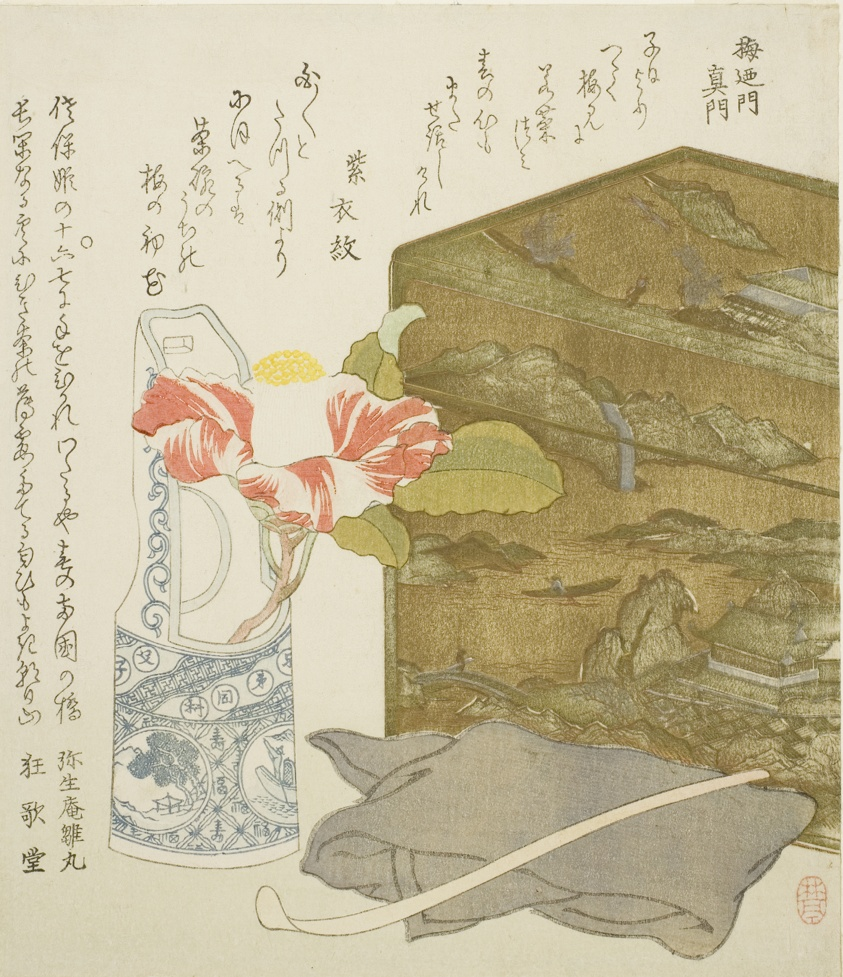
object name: Print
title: Camellia in Vase and Tea-utensil Box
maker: Rintei (Japanese, 19th century)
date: 1820s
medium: Color woodblock print; shikishiban, surimono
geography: Japan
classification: woodblock print; print; asian art